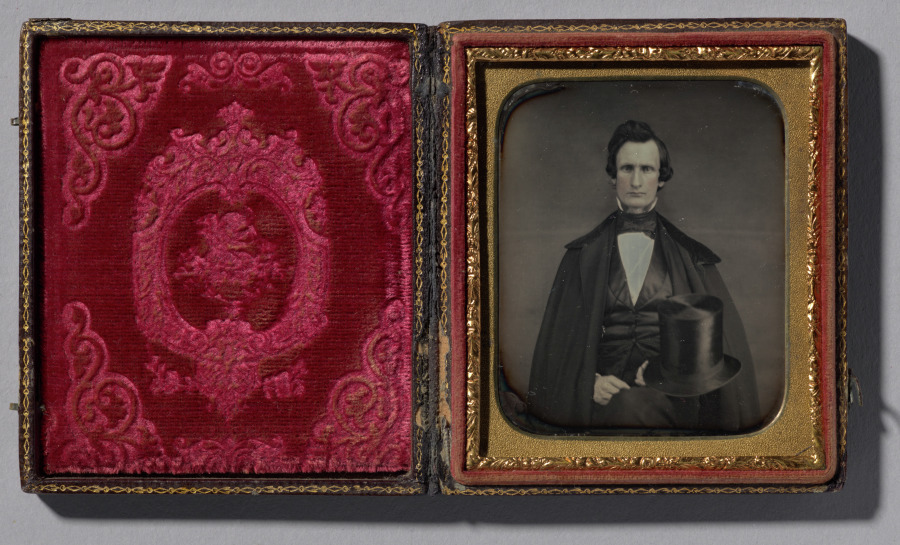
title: Magician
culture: America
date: c. 1850–55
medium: daguerreotype, sixth plate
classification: Photograph